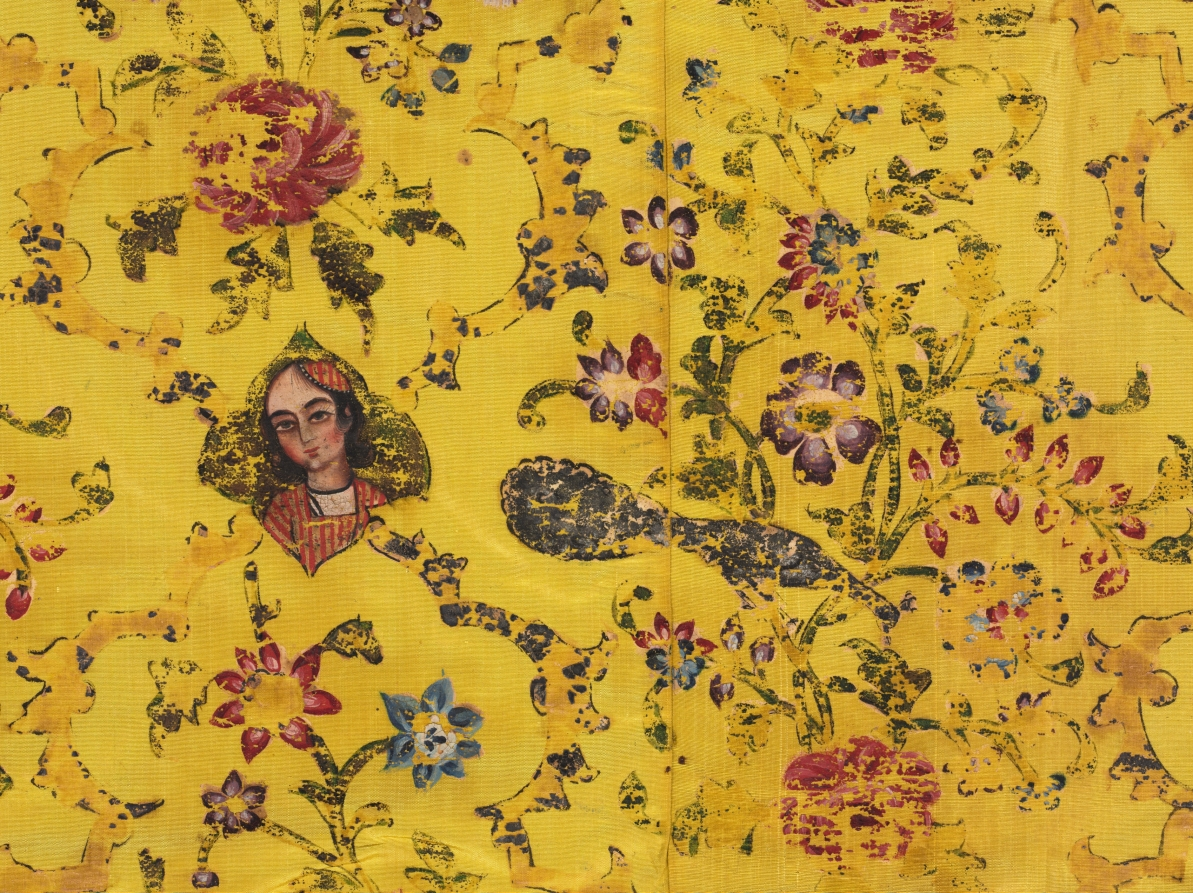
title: Wall cover with flora, peacocks, and portrait medallions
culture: Iran, Qajar period (1779-1925)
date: 1800s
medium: taffeta, hand-painted, block-printed: silk and pigments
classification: Textile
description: The European fashion of installing Chinese export silks with painted decoration as luxurious wall coverings may have inspired this exceptional Iranian silk. European engravings, which had flooded the Iranian market by the 19th century, most likely inspired the pattern. This rare silk fabric with painted figural and foliate decoration may have been a luxurious wall covering in a palace or grand mansion in the city of Kashan where mural paintings display similar 19th-century designs. Glistening silver pigment originally formed the palmette-leaf compartment outlines (now mostly deep yellow) that display colorful blossoming plants enlivened with now tarnished silver peacocks. At their junctures, portrait medallions of Iranian princesses are distinctly Qajar in attire and style, as are the composite blossoming plants.